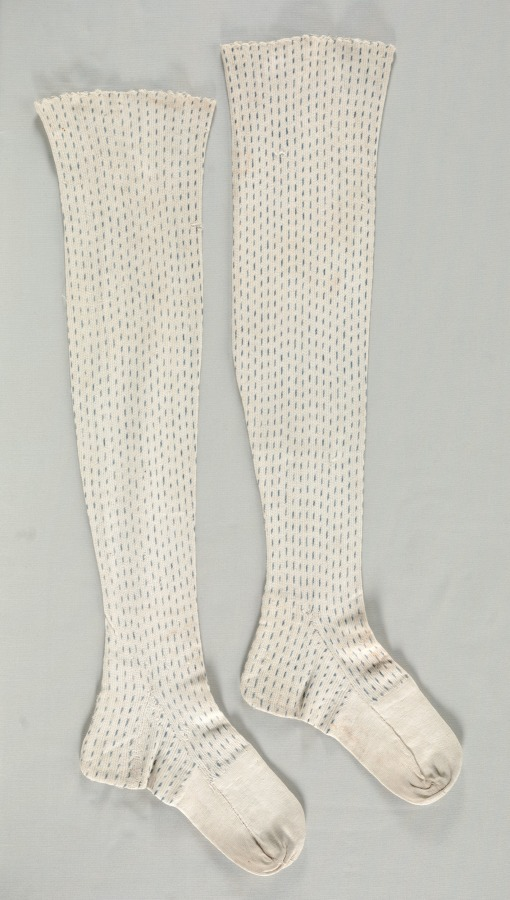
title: Pair of Stockings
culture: America, New York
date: 1790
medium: knitting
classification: Knitting